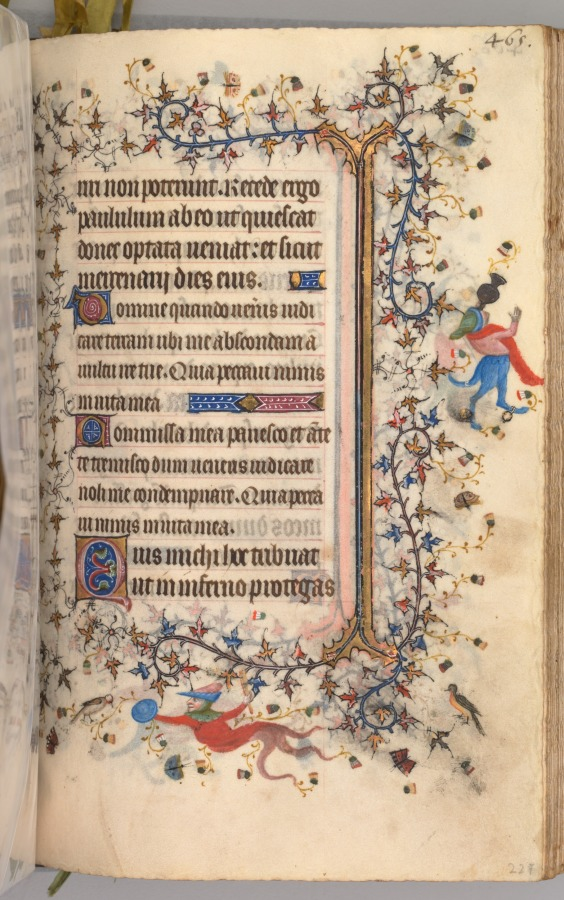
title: Hours of Charles the Noble, King of Navarre (1361-1425): fol. 227r, Text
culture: France, Paris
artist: Master of the Brussels Initials and Associates (French)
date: c. 1405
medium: ink, tempera, and gold on vellum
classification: Bound Volume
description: This precious volume was obviously highly prized by its owner, the French-born King of Navarre, who had his coat of arms painted on no less than twenty folios. Rather than directly commissioning this manuscript from a specific workshop, it seems that Charles the Noble acquired his book of hours -- perhaps ready-made for the luxury market -- while on a trip to Paris in 1404-05. A collaborative effort, six painting styles are evidenced within the pages of this codex, those of two Italians, two Frenchmen, and two Netherlanders. The painter who was responsible for the planning and decoration of the book, and who produced seventeen of the large miniatures, was a Bolognese artist known as the Master of the Brussels Initials. His principal assistant, responsible for most of the borders, was a Florentine who signed his name "Zecho" da Firenze on folio 208 verso.